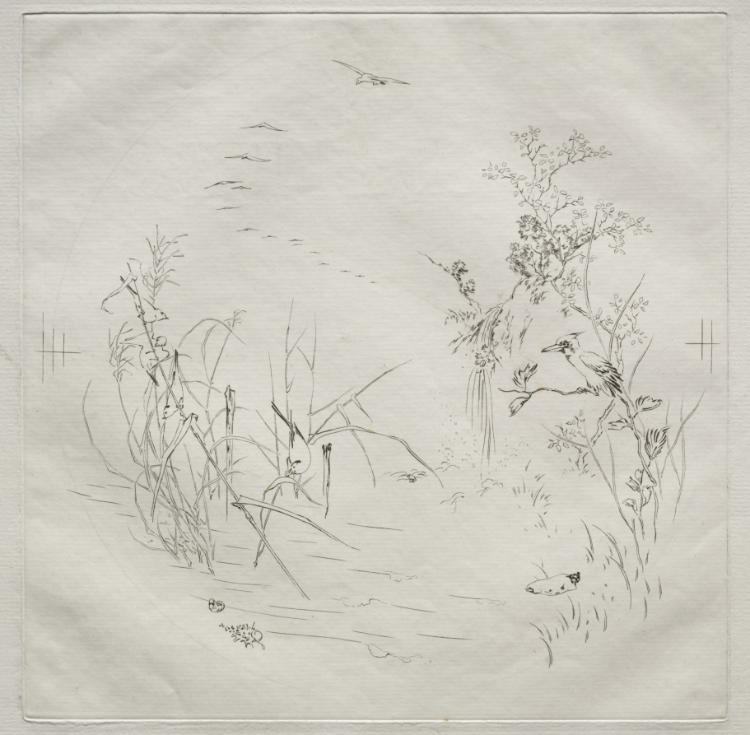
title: Parisian Service (Haviland service): Calm (no. 3)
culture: France, 19th century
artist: Félix Bracquemond (French, 1833–1914)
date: 1875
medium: etching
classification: Print